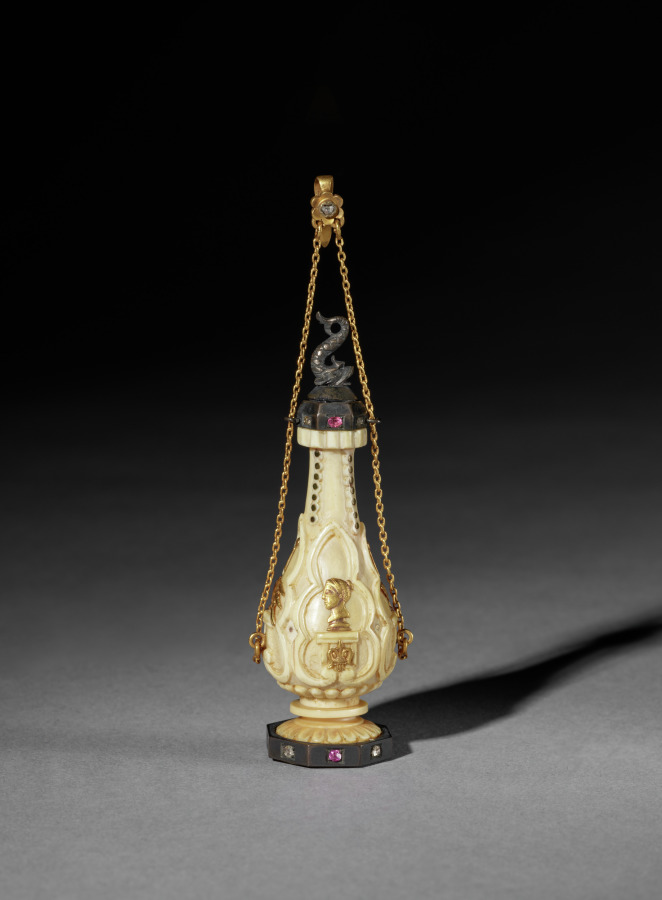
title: Scent Bottle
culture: Continental, mid-19th century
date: mid-1800s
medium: ivory with gold and silver mounts set with jewels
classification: Miscellaneous